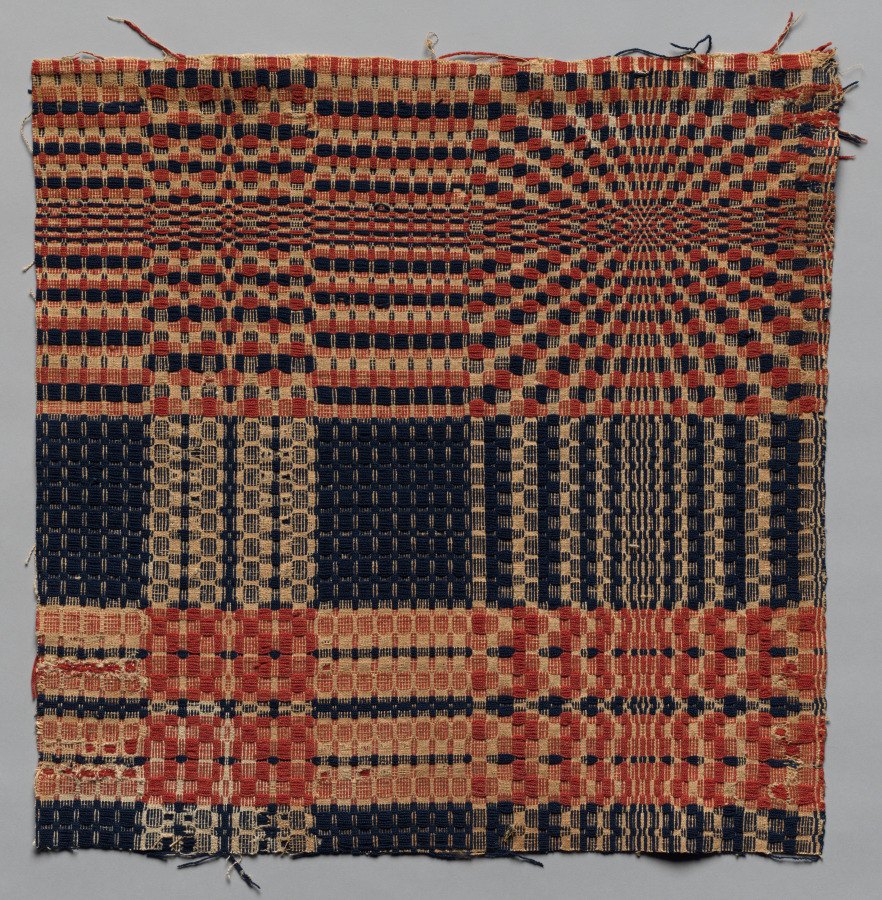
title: Coverlet Fragment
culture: America, early 19th Century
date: c. 1800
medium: hand weave: wool and cotton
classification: Textile